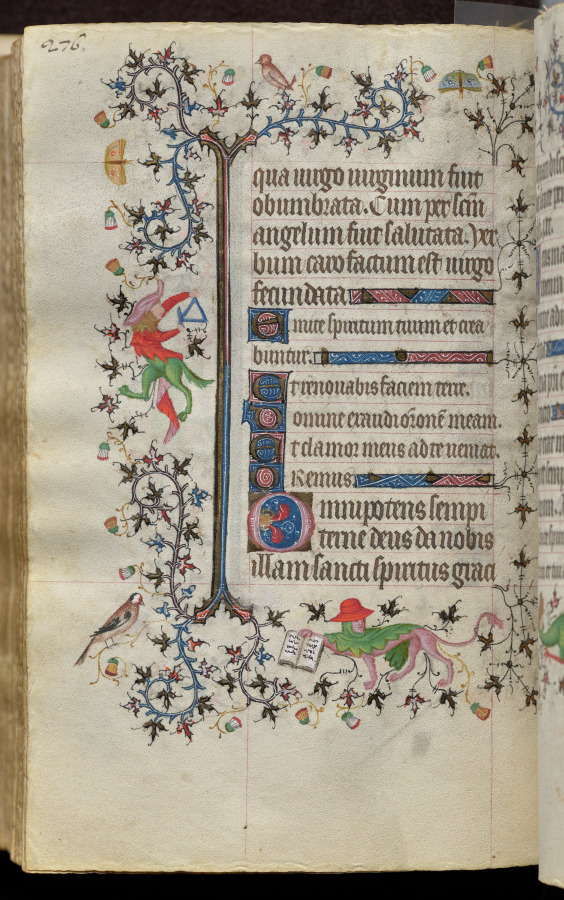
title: Hours of Charles the Noble, King of Navarre (1361-1425): fol. 138v, Text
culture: France, Paris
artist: Master of the Brussels Initials and Associates (French)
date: c. 1405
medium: ink, tempera, and gold on vellum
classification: Bound Volume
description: This precious volume was obviously highly prized by its owner, the French-born King of Navarre, who had his coat of arms painted on no less than twenty folios. Rather than directly commissioning this manuscript from a specific workshop, it seems that Charles the Noble acquired his book of hours -- perhaps ready-made for the luxury market -- while on a trip to Paris in 1404-05. A collaborative effort, six painting styles are evidenced within the pages of this codex, those of two Italians, two Frenchmen, and two Netherlanders. The painter who was responsible for the planning and decoration of the book, and who produced seventeen of the large miniatures, was a Bolognese artist known as the Master of the Brussels Initials. His principal assistant, responsible for most of the borders, was a Florentine who signed his name "Zecho" da Firenze on folio 208 verso.